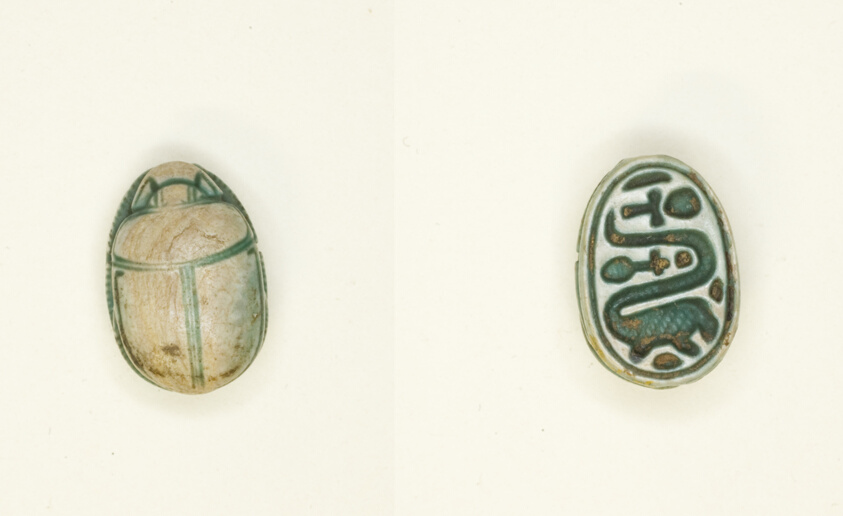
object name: Costume and Accessories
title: Scarab: Long-Necked Creature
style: middle kingdom, ancient, egyptian, second intermediate period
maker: Egyptian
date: Middle Kingdom–Second Intermediate Period, Dynasties 12–17 (about 1985–1550 BCE)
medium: Glazed steatite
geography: Egypt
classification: scarab; ancient art; costume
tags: Hieroglyphs, animals, insects